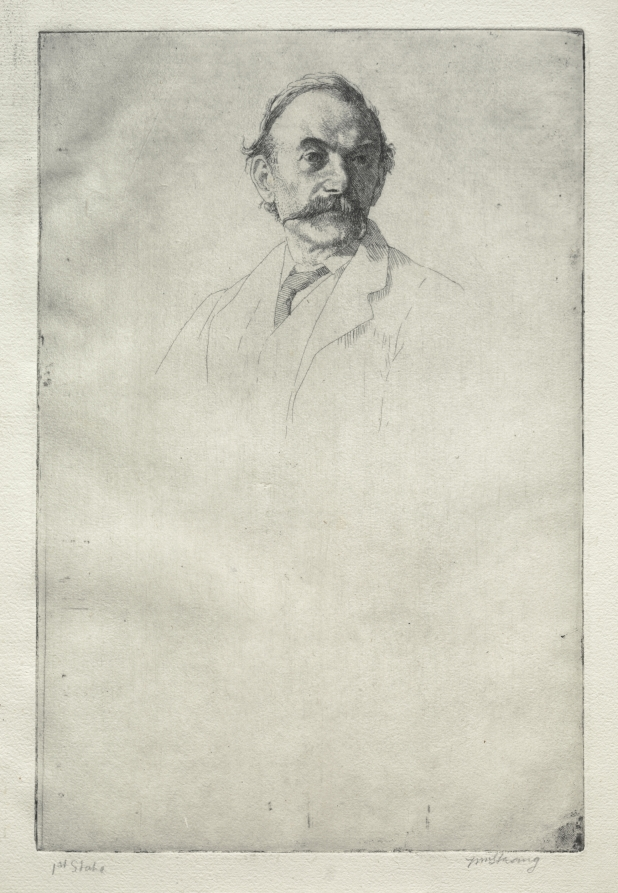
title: Thomas Hardy, No. 1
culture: England, late 19th Century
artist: William Strang (British, 1859–1921)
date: 1893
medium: etching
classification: Print